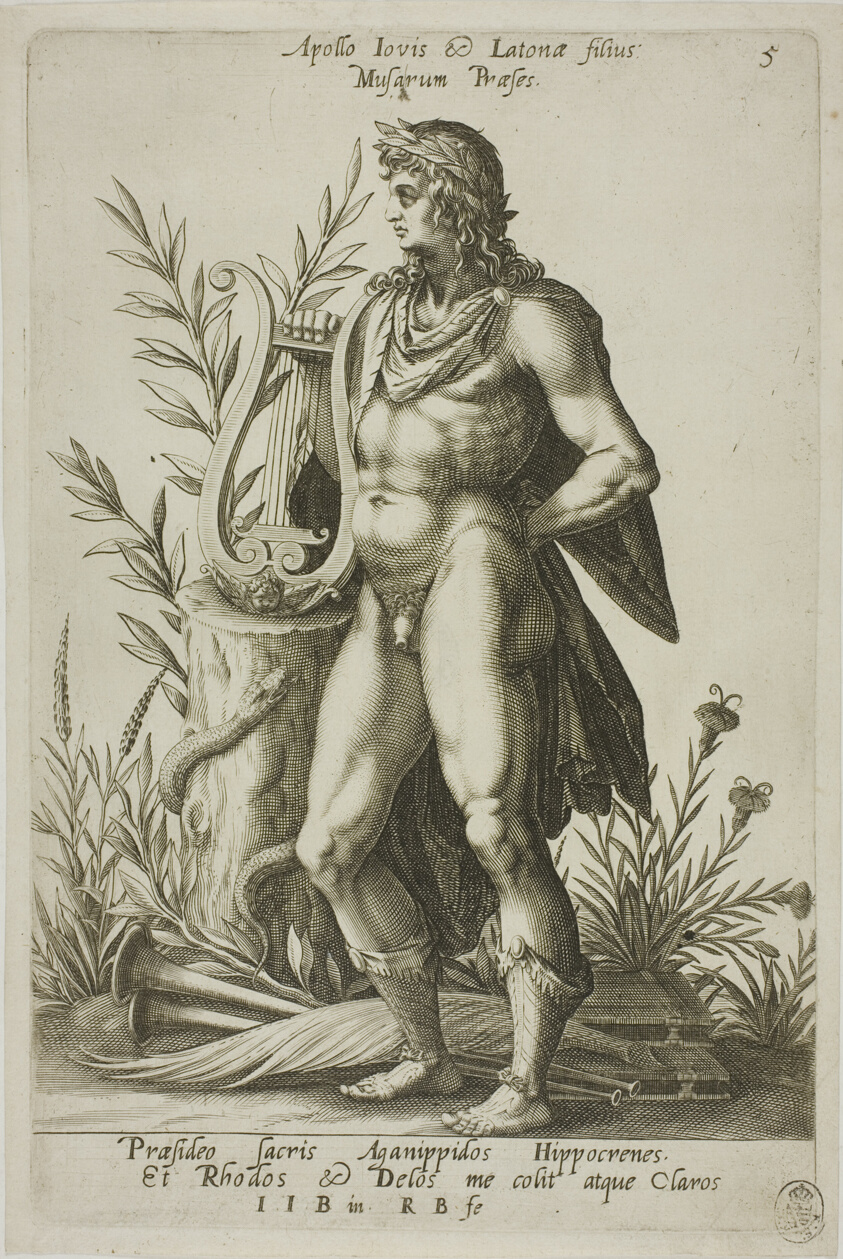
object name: Print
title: Apollo, plate 5 from Parnassus Biceps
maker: Robert Boissard (French, c. 1570–after 1597); after Jean-Jacques Boissard (French, 1533-1598)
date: 1601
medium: Engraving in black on ivory laid paper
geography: Frankfurt an der Oder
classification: engraving; print; prints and drawing